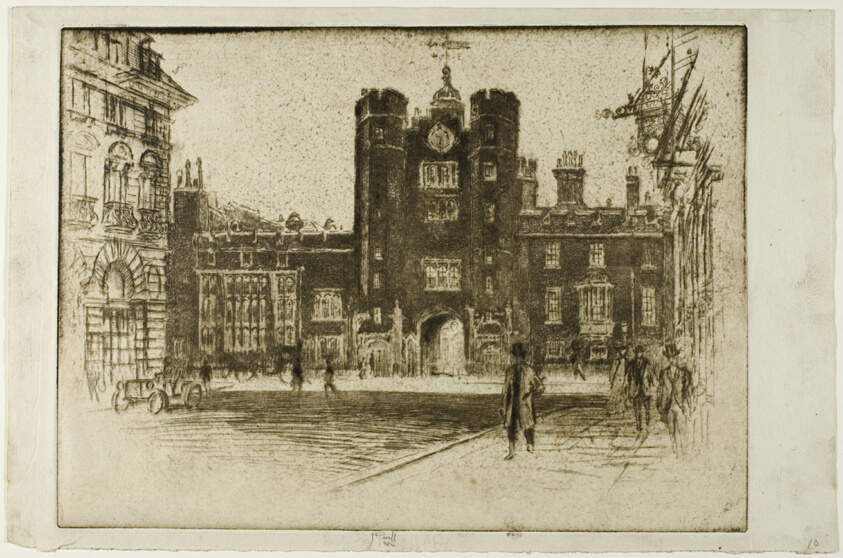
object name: Print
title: Saint James' Palace, from Saint James' Street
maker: Joseph Pennell (American, 1857-1926)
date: 1904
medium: Etching on ivory laid paper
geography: United States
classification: etching; print; prints and drawing